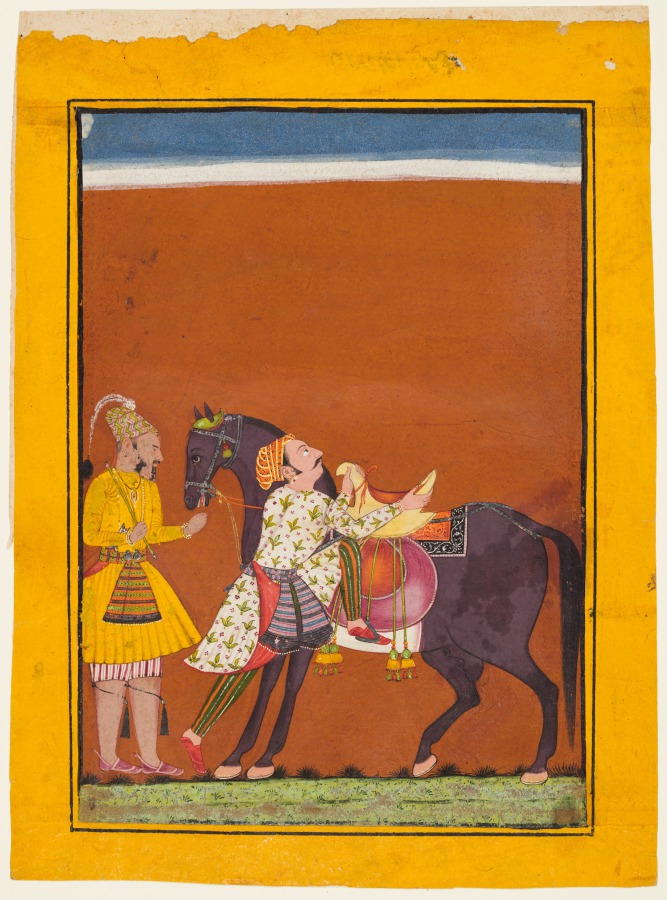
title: Sindhu (Saindhava) Ragaputra of Shri Raga, from a Ragamala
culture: Northern India, Pahari kingdoms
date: c. 1680–90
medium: gum tempera, ink, and gold on paper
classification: Painting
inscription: Verso: Ṭākrī inscription: śrī rāga saindhava 1. Ṭākrī numeral: 10.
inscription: Cover sheet: Stamp of the Mandi royal inventory with the number 2379 (?)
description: The hero launches into the saddle with vigor, as he embarks on a journey to meet his lover. He has tucked one end of his coat into his sash, so it will not be in the way. The horse’s mouth opens in a whinny, aligning with a poem that forms the basis of this image. Once part of a large series in the Mandi royal library, it is now widely dispersed. The name refers to the coastal region of Sindh in present-day Pakistan. The scene evokes the music of Sindh, which is well known for expressing emotional anguish of separation.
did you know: The warrior tucked the end of his tunic into his belt, showing the red lining.